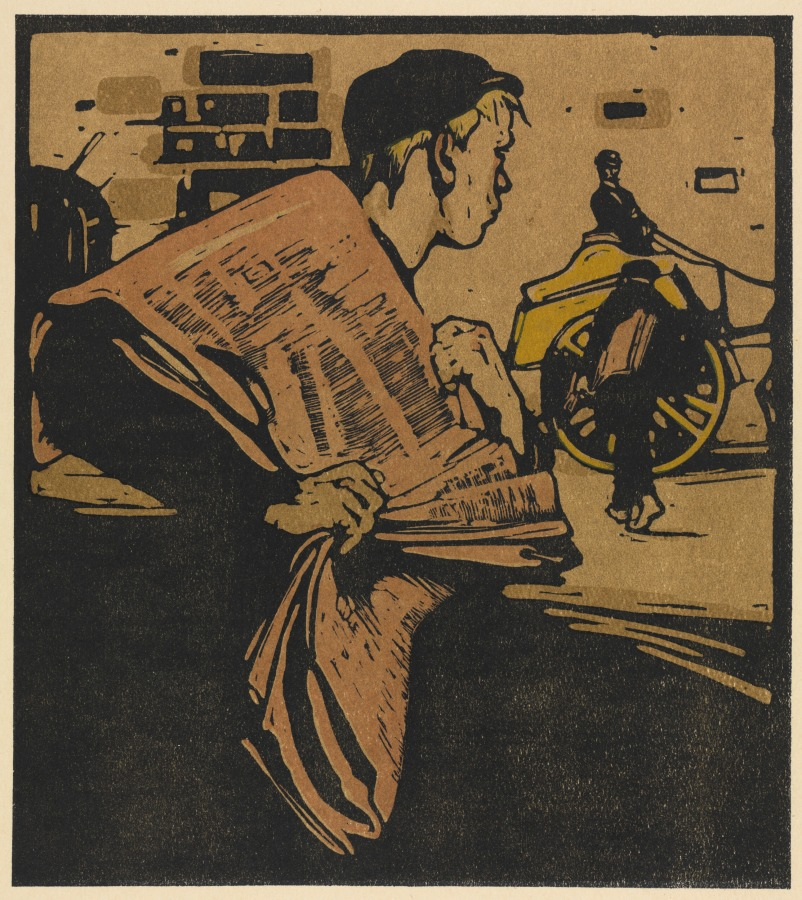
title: London Types: Newspaper Boy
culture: England, 19th century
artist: William Nicholson (British, 1872–1949)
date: 1898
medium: color lithograph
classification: Print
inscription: Lower margin, center, in pencil (not artist's hand): "9-15-114."